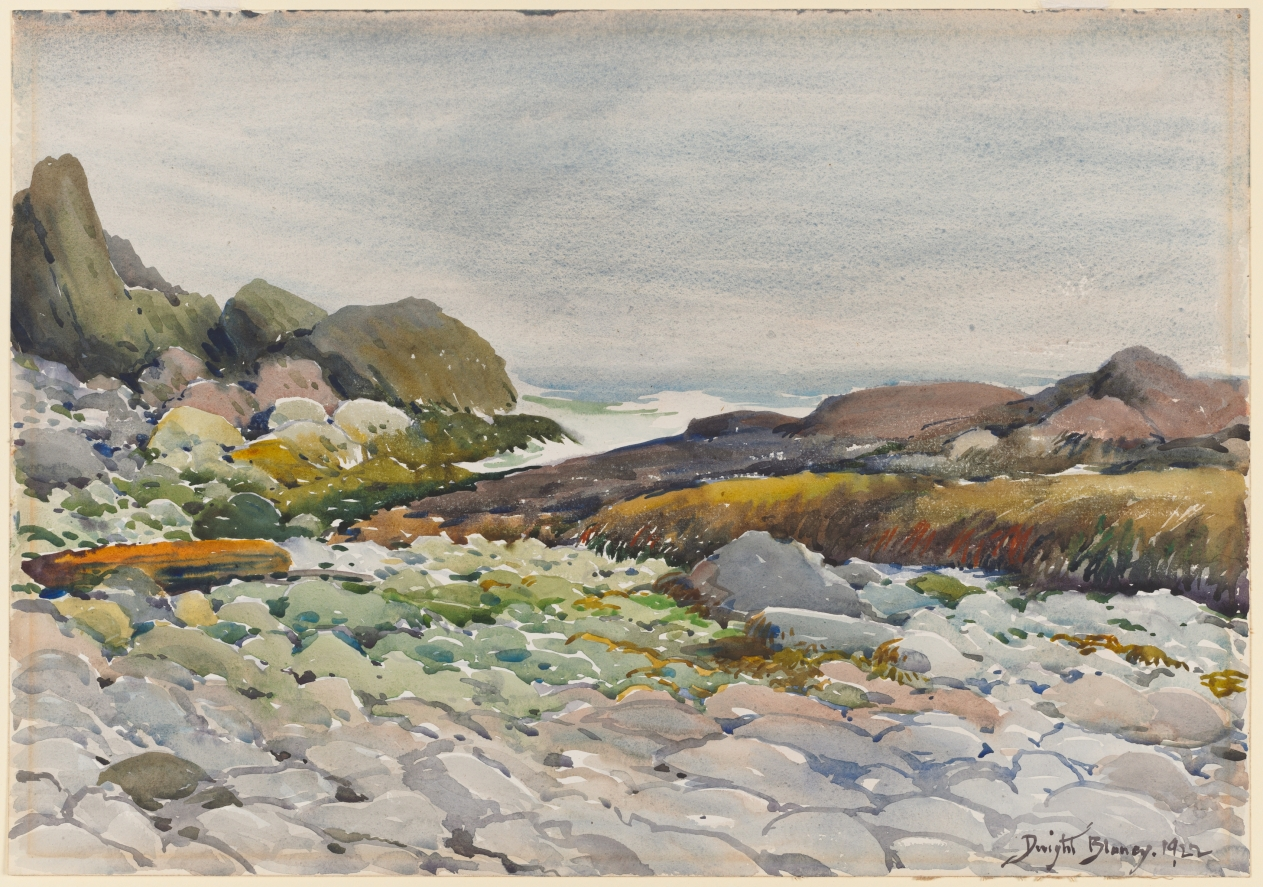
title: Over the Ledges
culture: America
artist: Dwight Blaney (American, 1865–1944)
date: 1922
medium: watercolor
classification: Drawing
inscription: Signed Dwight Blaney 1922 in lower right corner